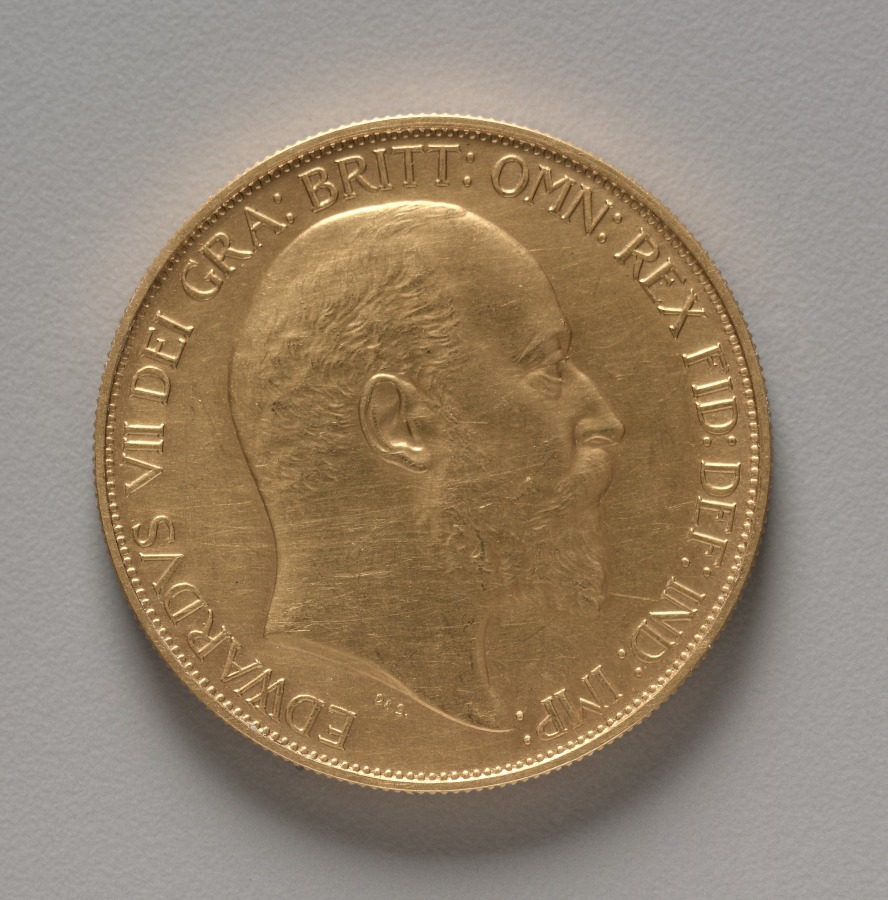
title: Five Pound Piece: Edward VII (obverse); St. George and the Dragon (reverse)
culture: England, Edward VII, 1901-1910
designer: after Benedetto Pistrucci (Italian, 1784–1855)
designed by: George Edward de Saulles (British)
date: 1902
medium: gold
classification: Coins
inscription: EDWARDVS VII DEI GRA: BRITT: OMN: REX FID: DEF: IND: IMP:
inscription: 1902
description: Struck for inclusion in the proof commemorative sets of the new coinage of the reign, this piece was unusual in having a frosted or matte surface, produced by the application of acid. Non-proof five-pound pieces were also struck, but not for circulation. George Edward de Saulles was appointed chief engraver at the Royal Mint in 1892. At his death, the position was abolished for the sake of 'greater freedom in obtaining designs." There is still, however, a body of engravers at the mint to carry out the work necessary in adapting coin designs and making the dies.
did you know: George Edward de Saulles designed coins under Queen Victoria and King Edward VII.